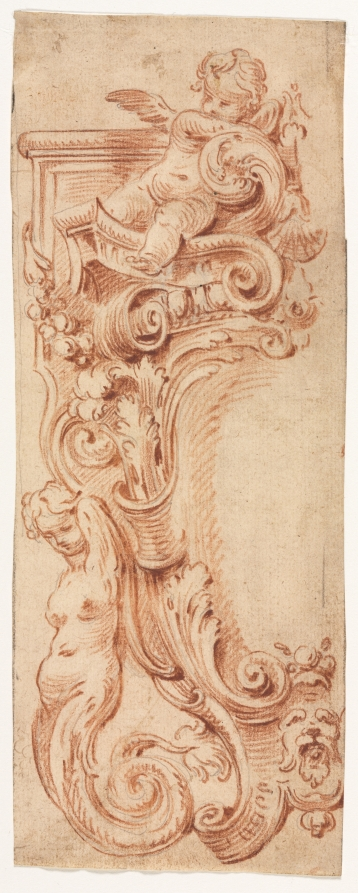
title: Design for a Cartouche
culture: France, 18th century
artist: Gilles Marie Oppenord (French, 1672–1742)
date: first half 1700s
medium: Red chalk with graphite on cream laid paper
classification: Drawing